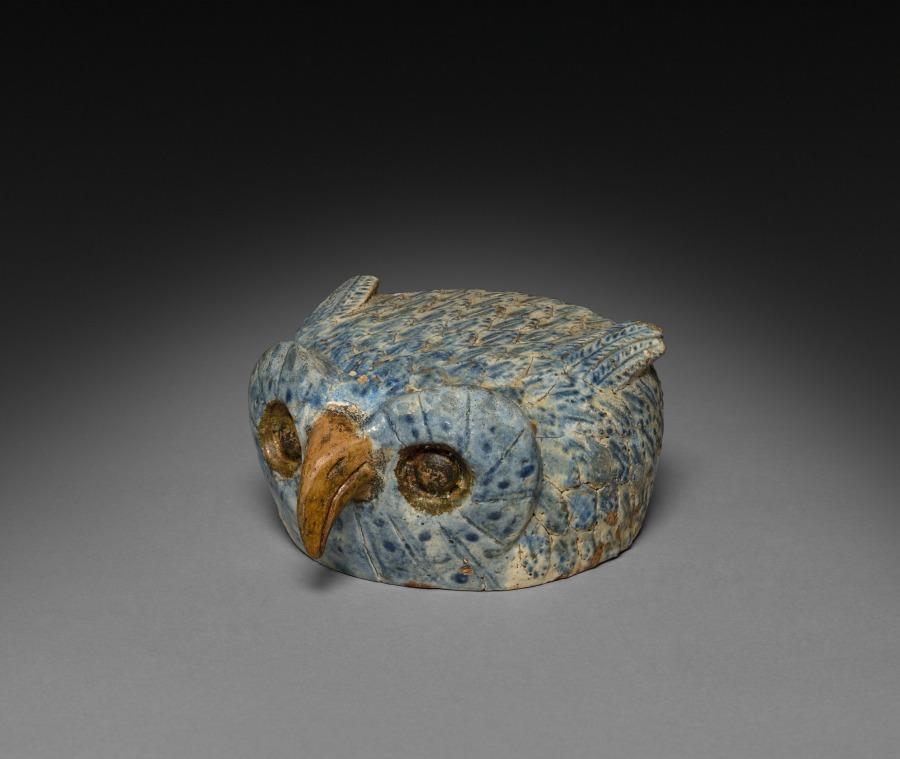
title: Owl (head)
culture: Southern Germany, 16th century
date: 1540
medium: faience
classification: Ceramic